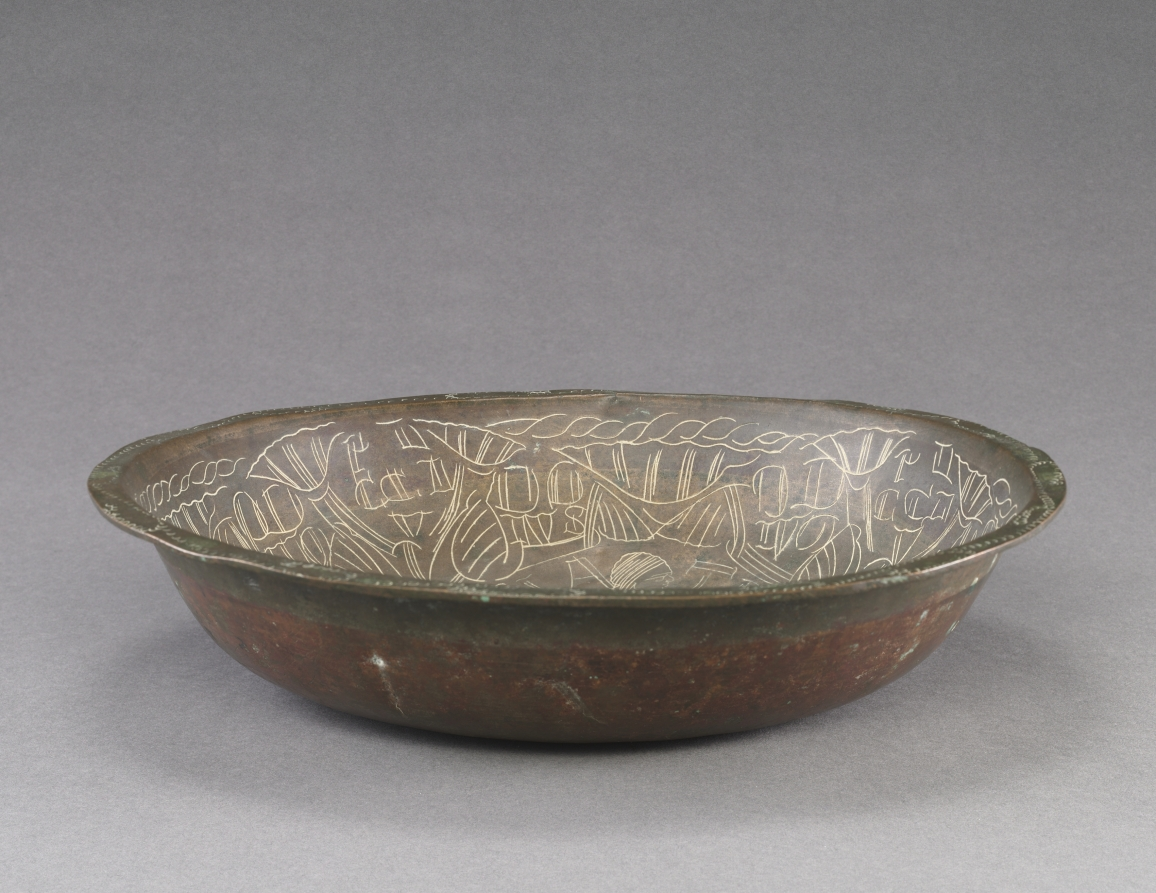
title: Bowl with Engraved Figures of Vices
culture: Germany, Gothic period, 12th century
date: 1150–1200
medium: bronze: spun, hammered, chased, and punched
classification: Metalwork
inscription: at the center of the bowl is a standing female figure with engraved identification: "SVPERBIA" (Pride); along the inner curvature are four bust-length figures with engraved names: "IDOLATRIA" (Idolatry), "INVIDIA" (Envy), "IRA" (Anger); and "LVXVRIA" (Self-Indulgence).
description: At the center of this bowl stands a female figure identified as SUPER[BI]A (pride). Represented along the curvature are four more bust-length figures: [I]DOLATRIA (idolatry), INVIDIA (envy), IRA (anger), and LUXURIA (self-indulgence). Bowls of this type were likely produced in medieval Germany and widely traded throughout northern Europe. Because of the moralistic symbolism employed in their iconographic programs, it has been suggested that such bowls were used in monasteries for hand washing during penitential activities. More recently, it has been suggested that they served as teaching aids for rhetorical instruction in medieval classrooms.